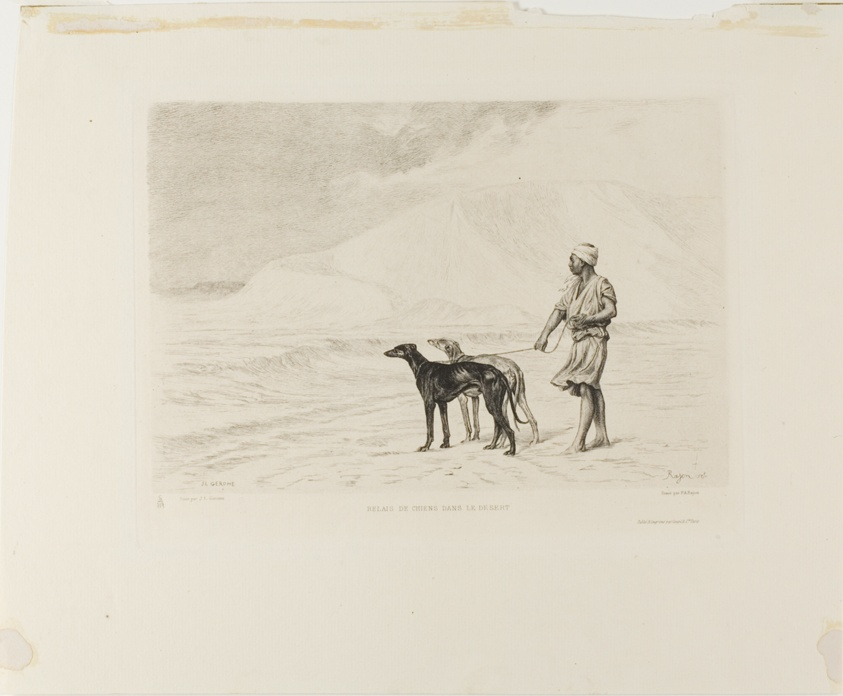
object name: Print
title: Relay of Dogs in the Desert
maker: Paul Adolphe Rajon (French, 1843-1888); after Jean Léon Gérôme (French, 1824-1904); published by Goupil et Cie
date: c. 1866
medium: Etching on ivory laid paper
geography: France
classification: etching; print; prints and drawing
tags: dogs, animals